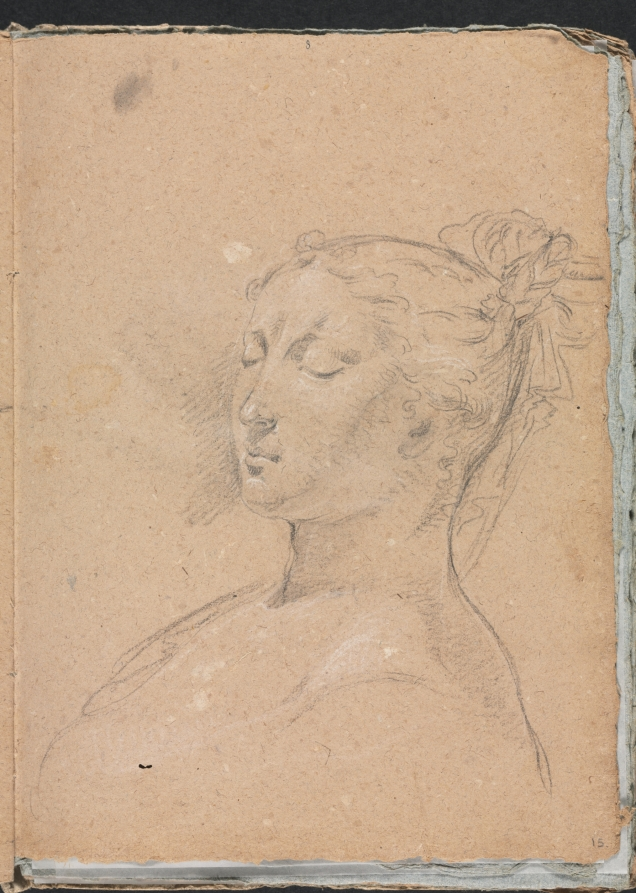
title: Verona Sketchbook: Woman with closed eyes (page 15)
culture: Italy, 18th century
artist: Francesco Lorenzi (Italian, 1723–1787)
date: 1760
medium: black chalk with white heightening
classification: Bound Volume